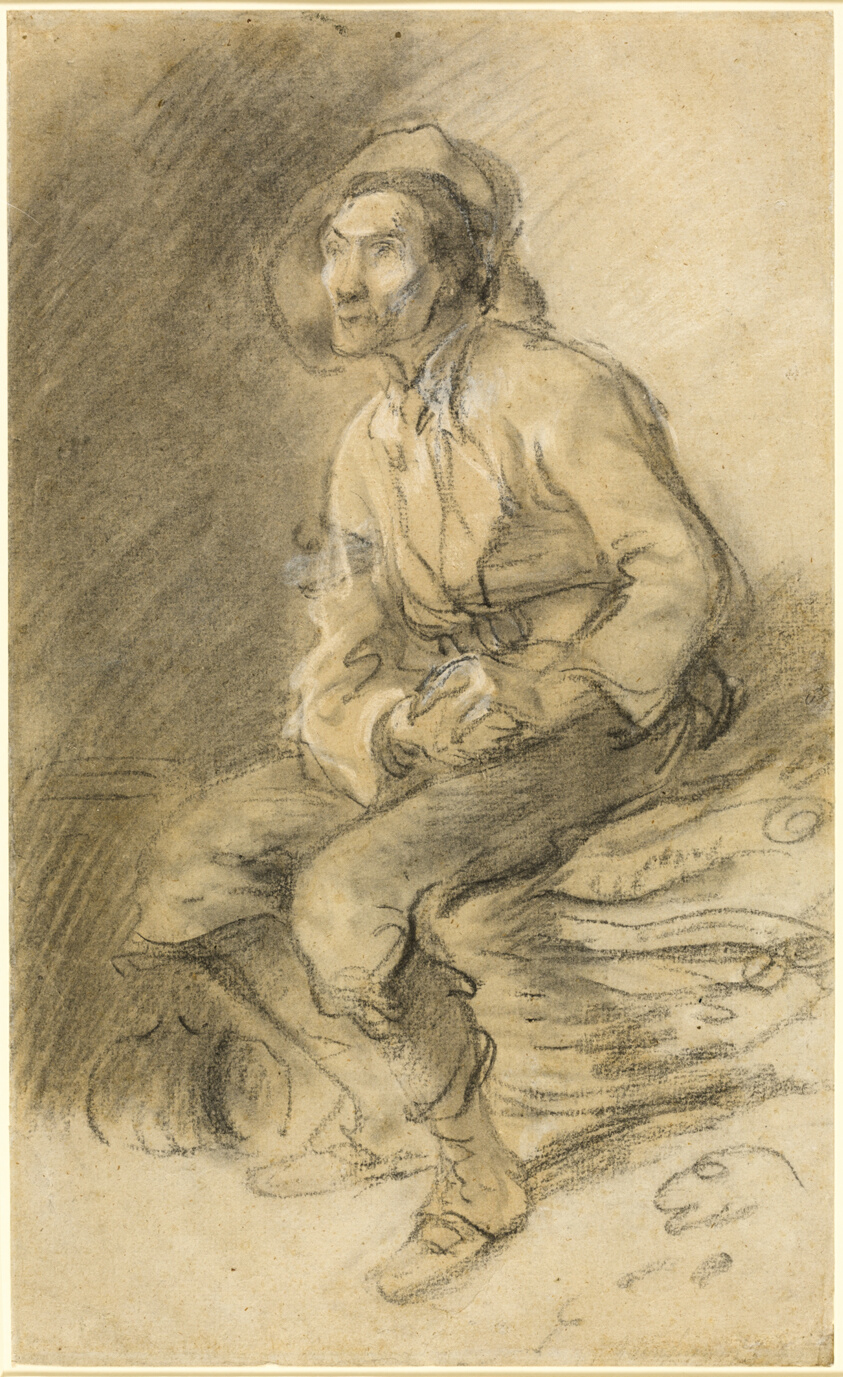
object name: Drawing and Watercolor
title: A Woodman Seated on a Bundle of Faggots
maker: Thomas Gainsborough (English, 1727-1788)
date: 1787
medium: Black chalk with stumping, heightened with touches of white gouache and traces of white chalk, on buff laid paper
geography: England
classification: chalk; drawings (visual works); prints and drawing